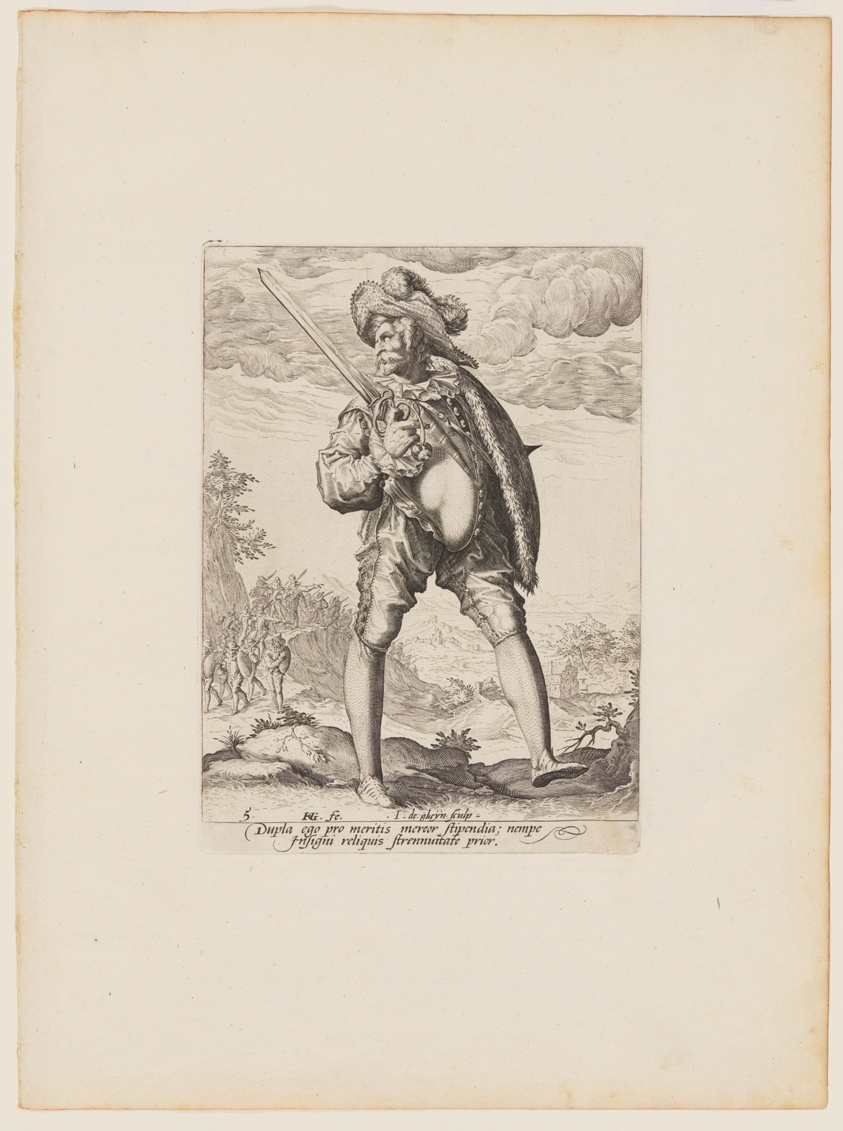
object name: Print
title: Soldier, Armed with Broadsword and Shield, from Officers and Soldiers of the Bodyguard of Emperor Rudolph II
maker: Jacques de Gheyn II (Dutch, 1565–1629); after Hendrick Goltzius (Dutch, 1558–1617)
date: 1587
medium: Engraving on ivory laid paper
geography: Netherlands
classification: engraving; paper; print; prints and drawing